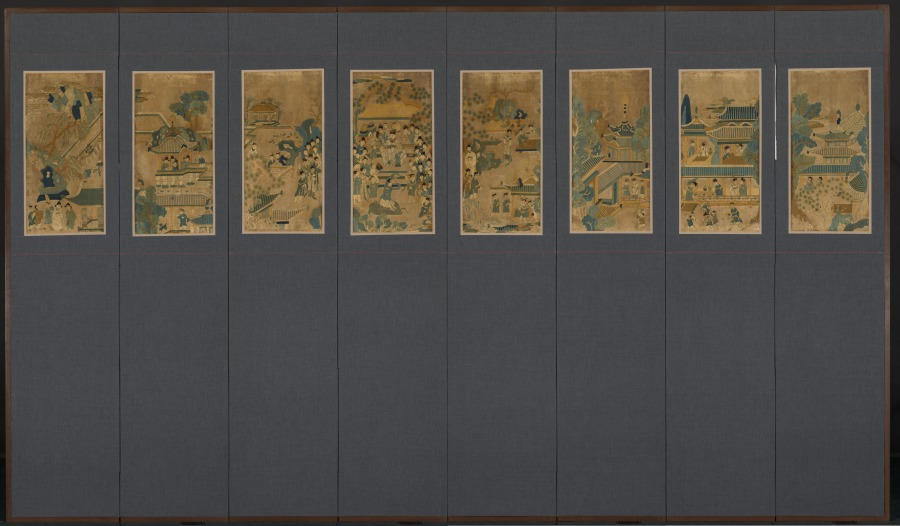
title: General Guo Ziyi’s Birthday Banquet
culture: Korea, Joseon dynasty (1392–1910)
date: early or mid-1800s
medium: Eight-panel folding screen, embroidery on silk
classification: Textile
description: The subject of this folding screen is a banquet in honor of Guo Ziyi (697–781), who is considered one of the greatest generals in Chinese history. He had a long and successful military career as well as a blissful family life. Thus, his image surrounded by his numerous family members symbolize the paragon of success and happiness. Using a wide spectrum of colorful silk threads, the artist colorfully depicts Guo enjoying his full-fledged retirement life.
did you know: This folding screen is highly likely to have been created by an amateur woman embroiderer.